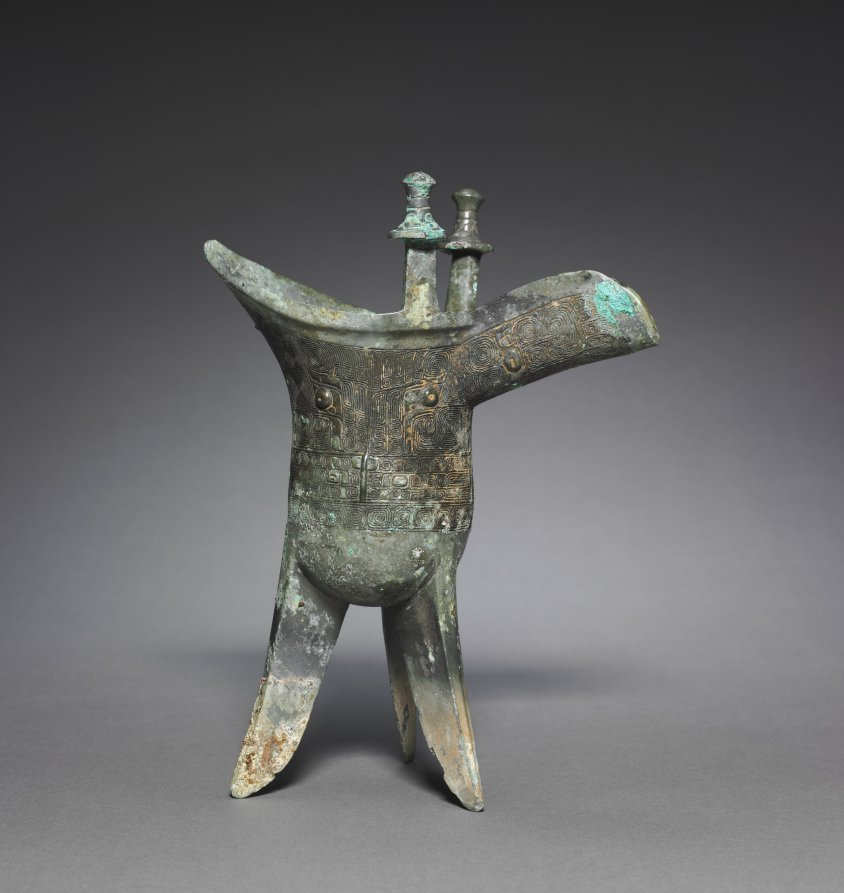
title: Wine vessel (Jue)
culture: China, Shang dynasty (c. 1600–c. 1046 BCE)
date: c. 1200 BCE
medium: bronze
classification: Metalwork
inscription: Inscription reads: Chu fu Yi (Father Yi of the Chu Clan)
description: Wine and food played a major role in ritual offerings to the ancestral spirits and the Supreme Ancestor (Shangdi) performed by the Shang rulers in the state cult of ancestor worship. A variety of wine vessels—each type given a specific name—was cast to bear witness to the power and artistic vitality of this remote civilization. This example of a jue wine cup is for libations. Other types of wine vessels include jia (wine warming vessel), fangyou (square wine container), and gu (beaker with a trumpeted mouth for pouring).